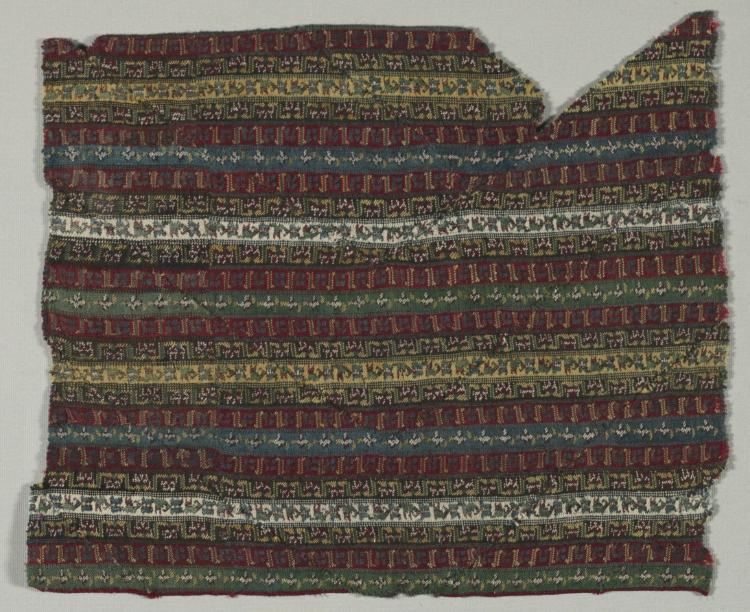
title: Fragment of a Shawl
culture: India, Kashmir, 19th century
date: 19th century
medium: twill weave, brocaded; wool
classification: Textile